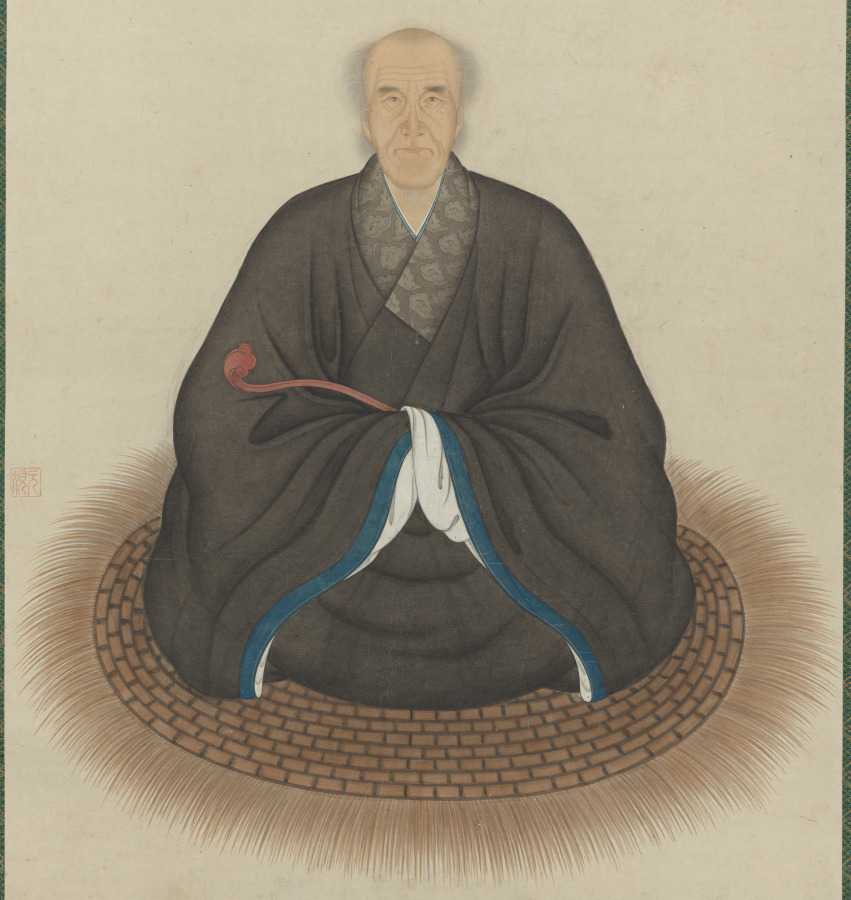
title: Portrait of Duli Xingyi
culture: Japan, Edo period (1615–1868)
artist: Kita Genki (Japanese, active c. 1664–98)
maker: Duli Xingyi (Chinese, 1596–1672)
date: 1671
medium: hanging scroll; ink and color on paper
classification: Painting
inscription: 1671 inscription at top of scroll by Duli Xingyi with three seals, 東矣䪩 (prefatory), 遺世獨立 (top) , 天外一閒人 (bottom); seal of Genki at lower left of painting 元規 .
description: In this portrait, the Ōbaku school Buddhist monk Duli Xingyi (born Tai Li, 1596–1672), whose name is pronounced Dokuryū Shōeki in Japanese, sits upon a woven mat holding a ceremonial scepter known as a ruyi, or nyoi in Japanese. Above his head is an insciption he added to the painting in 1671, the year before his death. It may be translated to read: Contemplative emptiness: the moon suspended over the village at midnight. Suddenly my soul is startled by the howl of an ape. Who could know that it would arouse me beyond my senses, and bring me an inner vision from Mt. Sumeru. (translated by Stephen Addiss and Kwan S. Wong) Originally from what is now the city of Hangzhou in China, Duli emigrated to Japan in 1653, where he took monastic vows. His skills in calligraphy and seal carving were formidable. Painter Kita Genki combined Chinese brush styles he learned in Nagasaki with Western painting techniques to capture Duli's likeness.